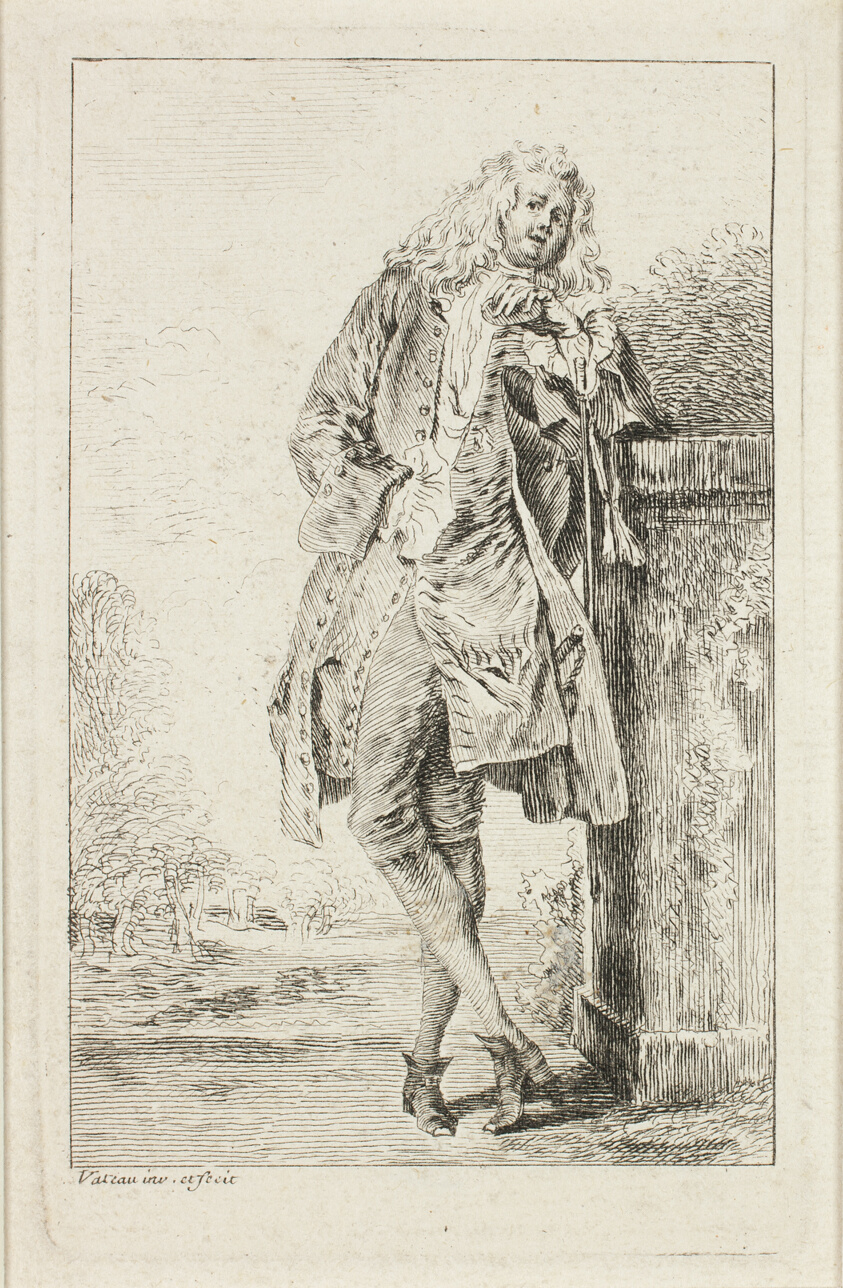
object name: Print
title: Standing Man Leaning against a Plinth, from Figures de modes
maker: Jean Antoine Watteau (French, 1684-1721)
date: c. 1710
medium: Etching in black on ivory laid paper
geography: France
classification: etching; paper; print; prints and drawing